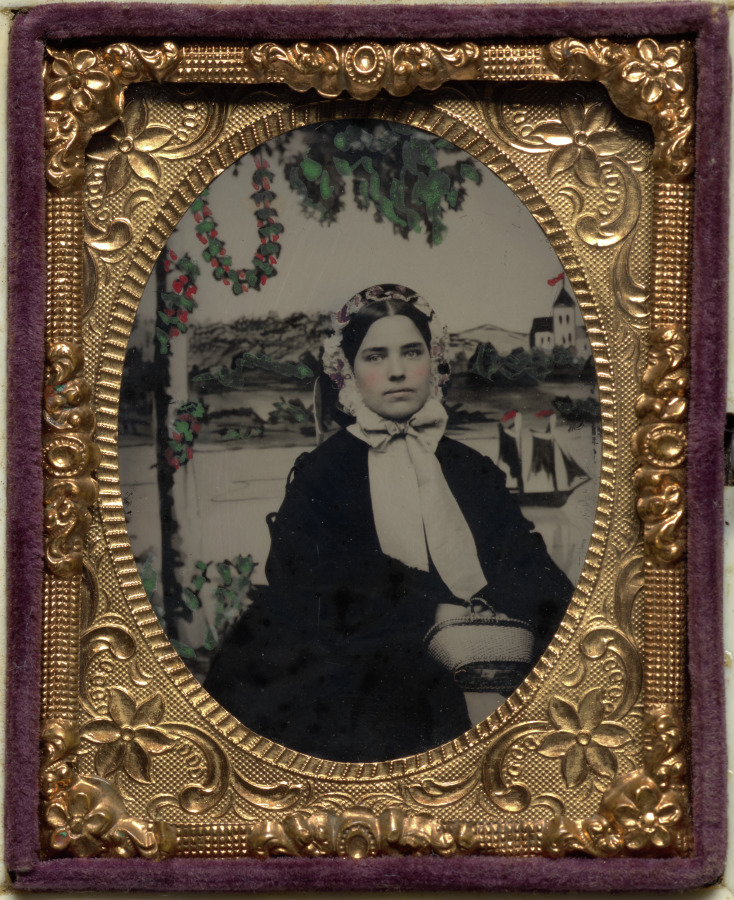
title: Woman with elaborate nautical backdrop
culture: America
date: c. 1860–65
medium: ambrotype, tinted, ninth plate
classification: Photograph